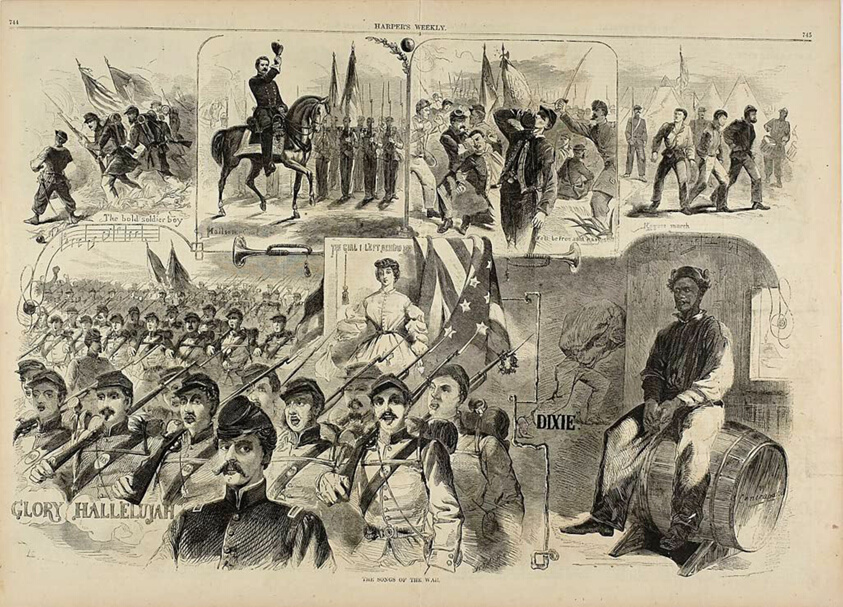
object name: Print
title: The Songs of the War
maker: Winslow Homer (American, 1836-1910); published by Harper's Weekly (American, 1857-1916)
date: published November 23, 1861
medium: Wood engraving on paper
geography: United States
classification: wood engraving; print; prints and drawing